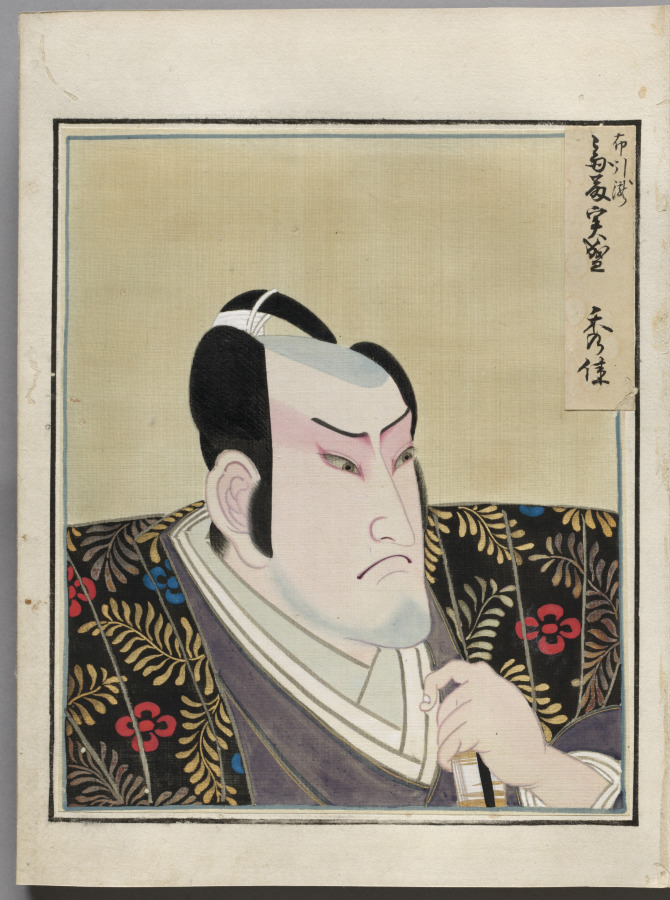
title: Double-Leaf from Album of Actor Portraits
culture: Japan, Edo period (1615–1868)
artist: Shōrakusai (Japanese)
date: c. 1790–1810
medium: double-leaf from an accordion-style album; ink and color on silk (left)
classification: Bound Volume